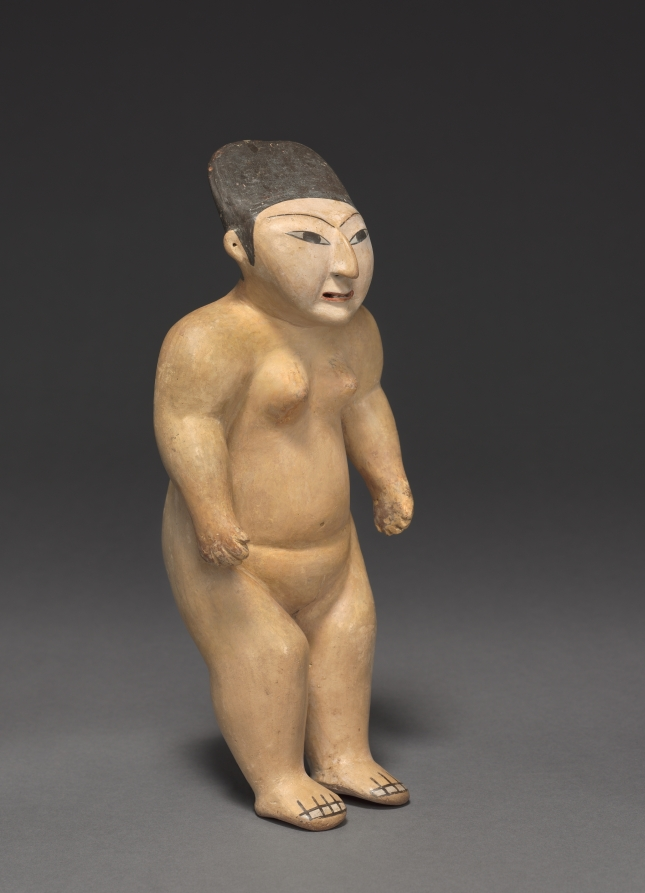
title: Female Figure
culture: Peru, South Coast, Nasca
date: 100 BCE–700 CE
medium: earthenware with colored slips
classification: Sculpture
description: This figure, which may once have worn small garments, might be a tomb offering. Her tapered head reflects the practice of cranial shaping, which may identify her social group and serve as a mark of beauty. Her fleshy hips likely refer to human and plant fertility, since food is the source of such bodily wealth. Her identity is unknown.